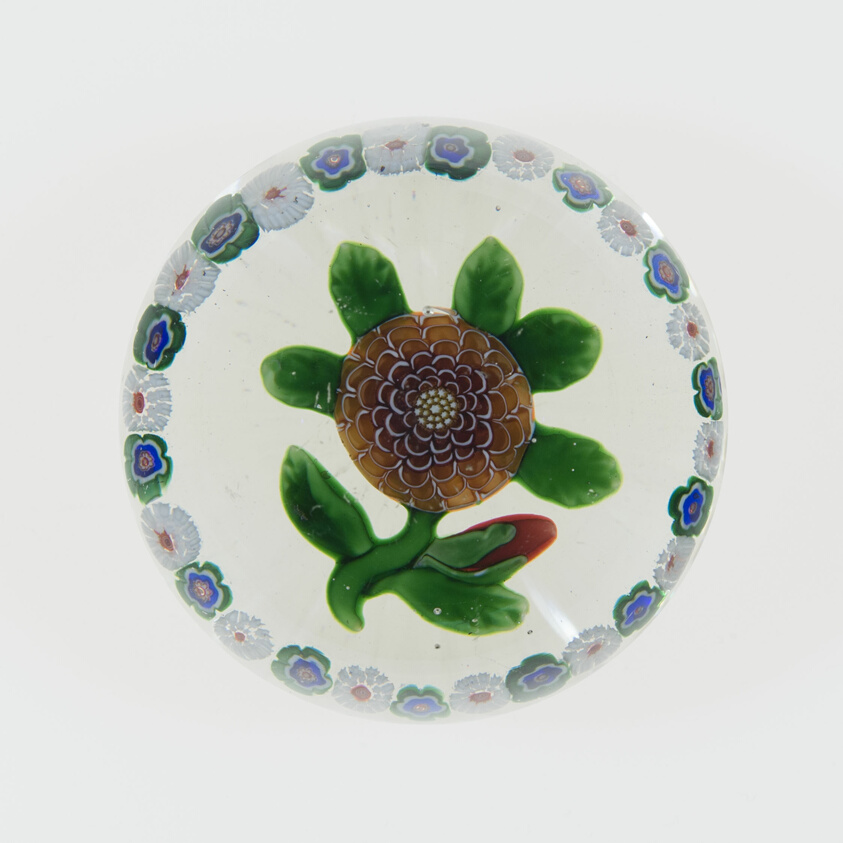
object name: Glass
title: Paperweight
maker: Baccarat Glassworks (Cristalleries de Baccarat); Lorraine, France, founded 1764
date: c. 1848–55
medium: Glass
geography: Lunéville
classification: paperweight; lampwork; european decorative arts; glass